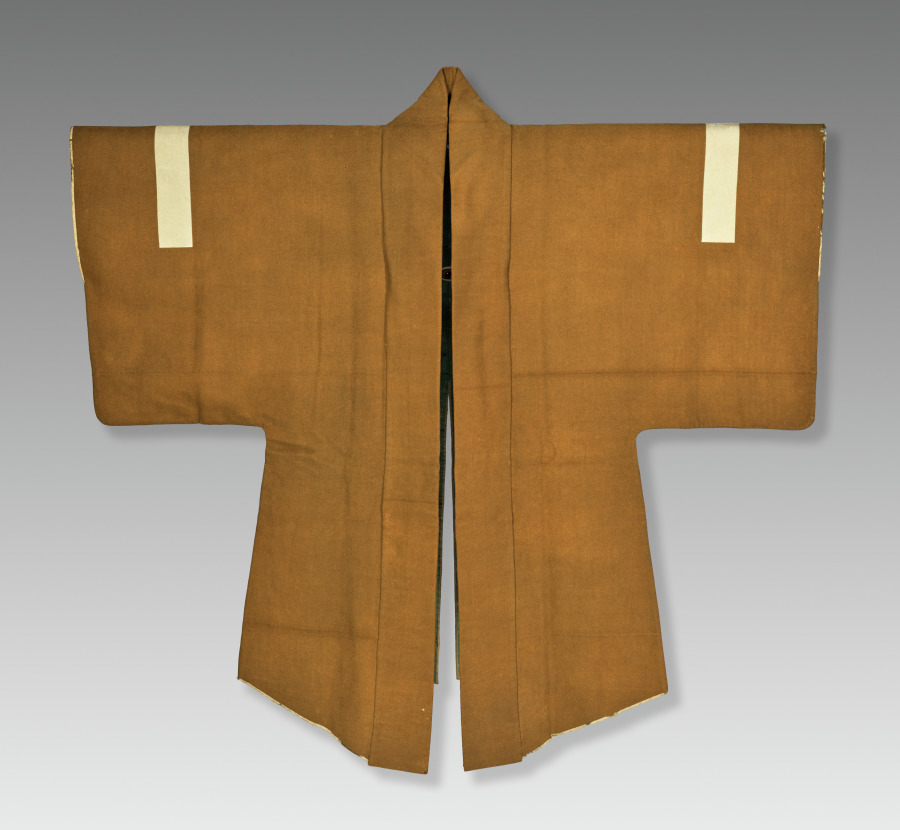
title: Firefighter's Suit (Kaji shōzoku)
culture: Japan, Edo period (1615–1868)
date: late 1700s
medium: Wool (rasha); applique and silk and gold thread cord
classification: Textile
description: Wood architecture in densely populated areas made firefighting a frequent occurrence in the Edo period (1615–1868). Jackets made of leather or wool offered firefighters protection against the flames. Wool was imported from Europe. The triple ring crest in white is of the “three alternating rings” (mitsurin chigai) type framed in a tortoise shell (kikko) motif, and identified the house with which the wearer was affiliated.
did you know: Wool has self-extinguishing properties that protect the wearer from fire.